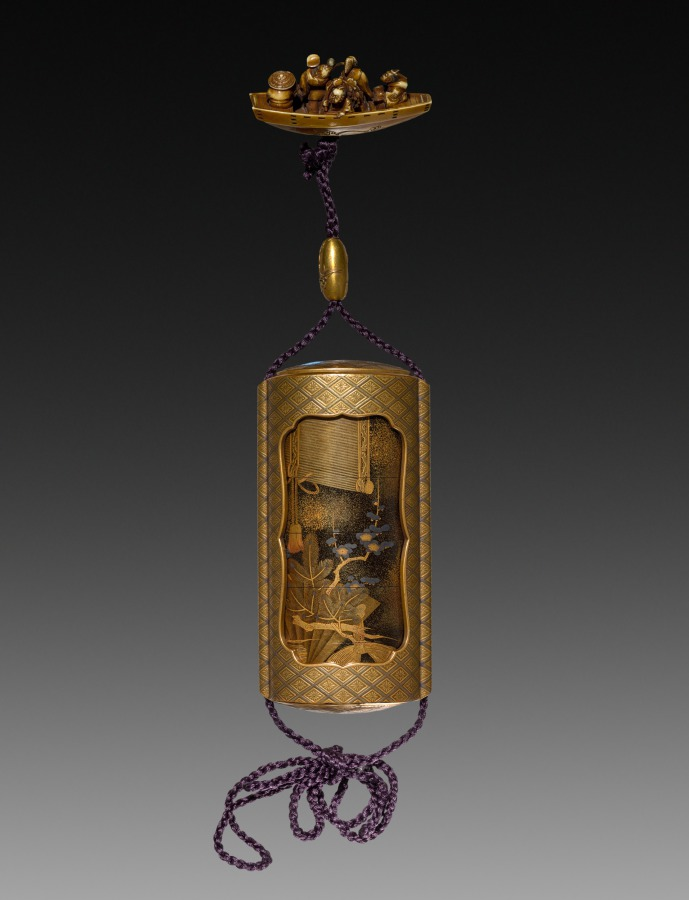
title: Inro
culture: Japan, Edo period (1615–1868)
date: late 1700s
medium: lacquer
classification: Lacquer